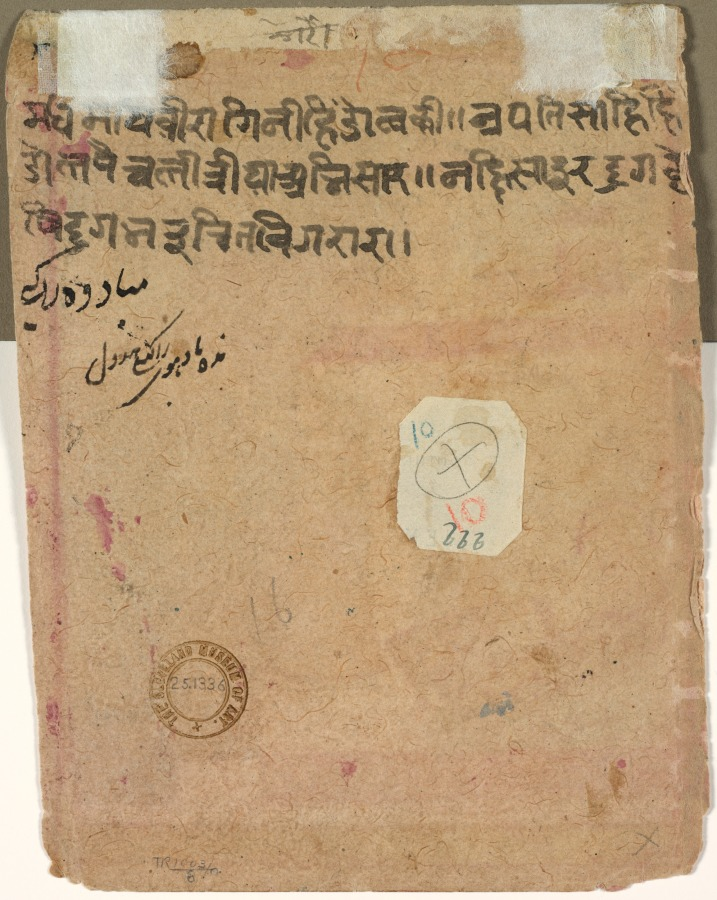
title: Madhu Madhavi Ragini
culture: Central India, Malwa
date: c. 1630–40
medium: Gum tempera, ink, and gold on paper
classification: Painting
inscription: Inscription in Hindi on reverse: Madhu Madhavi, the ragini of Hindol: a heroine who has come to her lord. The eye sees less than all and is at variance with thought (paraphrased from Coomaraswamy, 1916); title repeated in Persian.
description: One of the first paintings to be published and exhibited as an example of native Indian court painting without foreign stylistic influence, this work emphasizes the expression of mood and emotion rather than pictorial narrative. Through bold contrasting color, suggestive gaze, and poetic trope, the viewer accesses the charged excitement of lovers about to be united with the coming of the monsoon at night. The reclining hero admires the alluring form of his beloved who, startled by the lightning and the cry of the peacock, stops and twists around in a dramatic pause that sets off her figure to especially good effect. She raises one hand to feel the first drops of monsoon rain that signal the beginning of the season of lovemaking, when her lover remains at home.